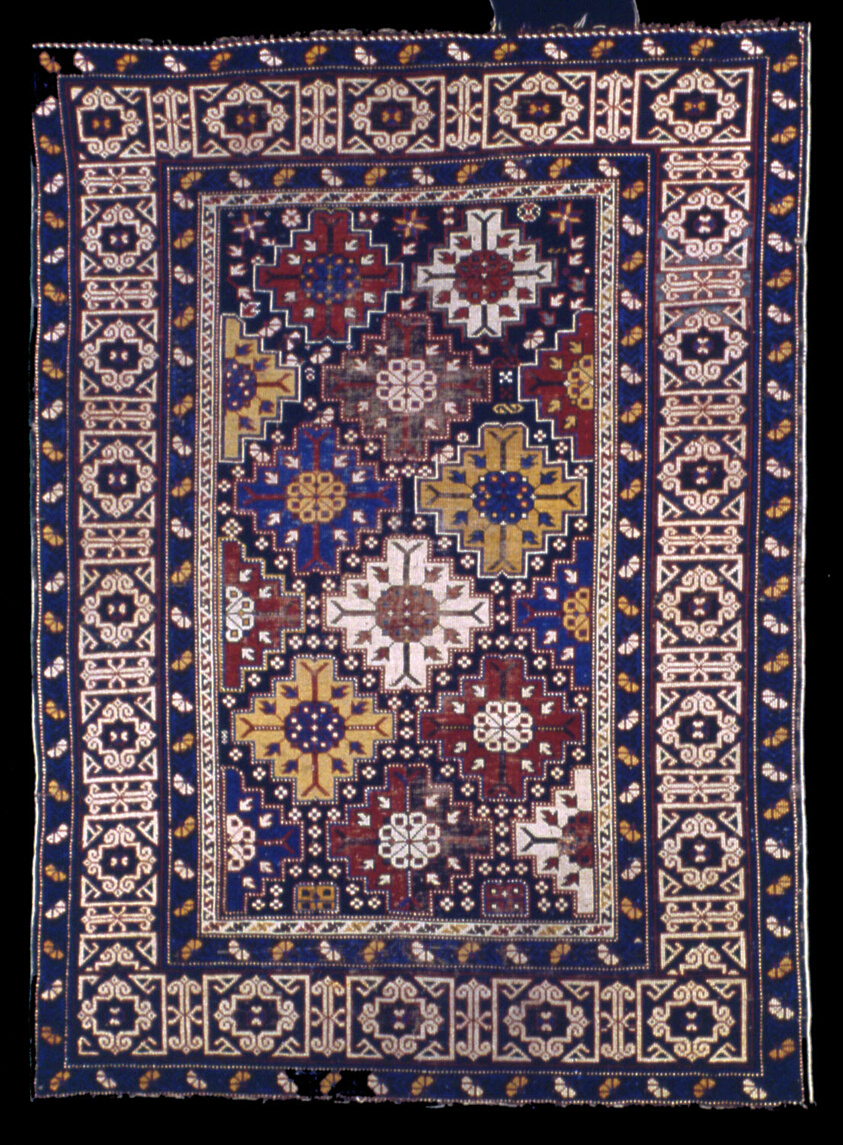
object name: Textile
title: Carpet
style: shirvan, caucasian, central asian, asian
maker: Caucasus, Shirvan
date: 1875/1900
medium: Wool, plain weave with supplementary wrapping wefts forming cut pile through a technique known as "Ghiordes knots"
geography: Caucasus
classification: weaving - carpet; textile